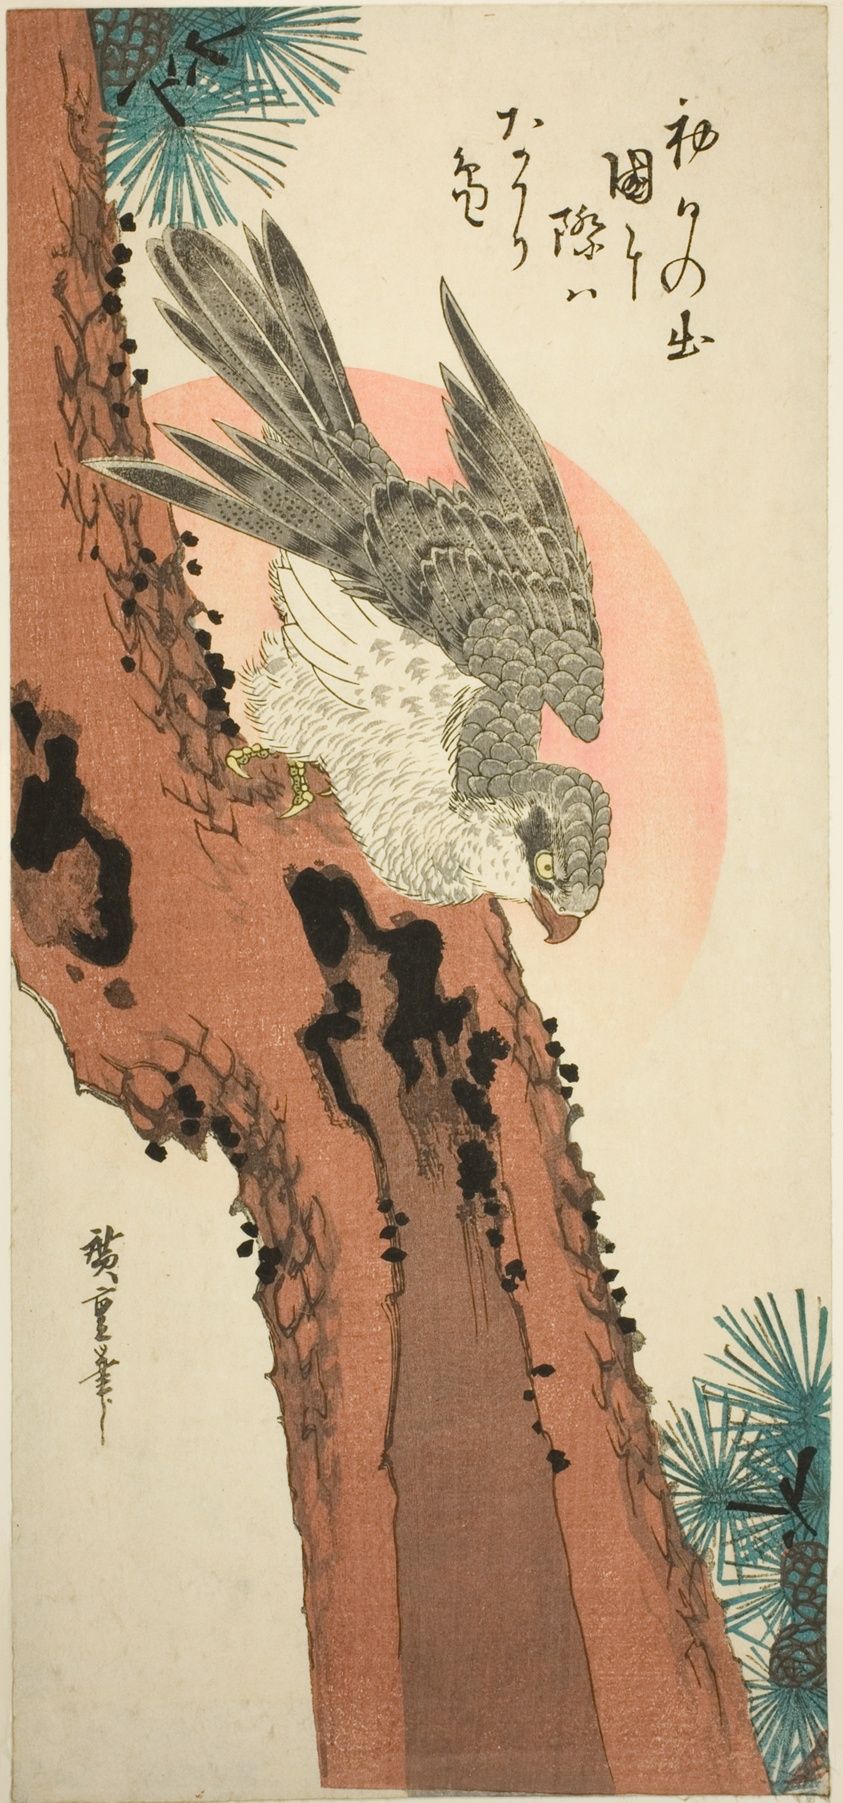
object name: Print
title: Falcon on a Pine Tree with the Rising Sun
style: Japanese (culture or style)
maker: Utagawa Hiroshige 歌川 広重; Japanese, 1797-1858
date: c. 1835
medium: Color woodblock print, otanzaku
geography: Japan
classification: woodblock print; print; asian art